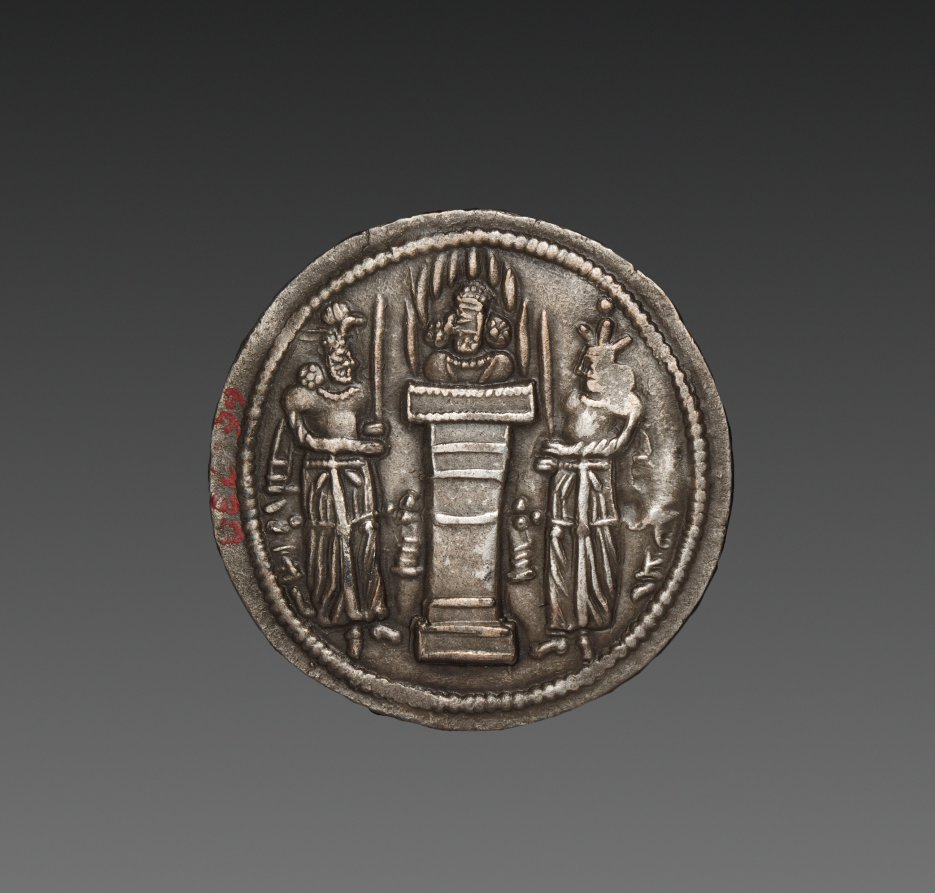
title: Drachm: Fire altar with bust of Hormizd II, Zoroastrian priest holding sword left, King as priest holding sword right (reverse)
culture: Iran, Sasanian Empire (224–651 CE), reign of Hormizd II (303–309)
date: 303–9 CE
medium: silver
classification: Coins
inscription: 𐭠𐭲𐭥𐭫𐭦𐭩𐭠𐭥𐭧𐭬𐭦𐭣